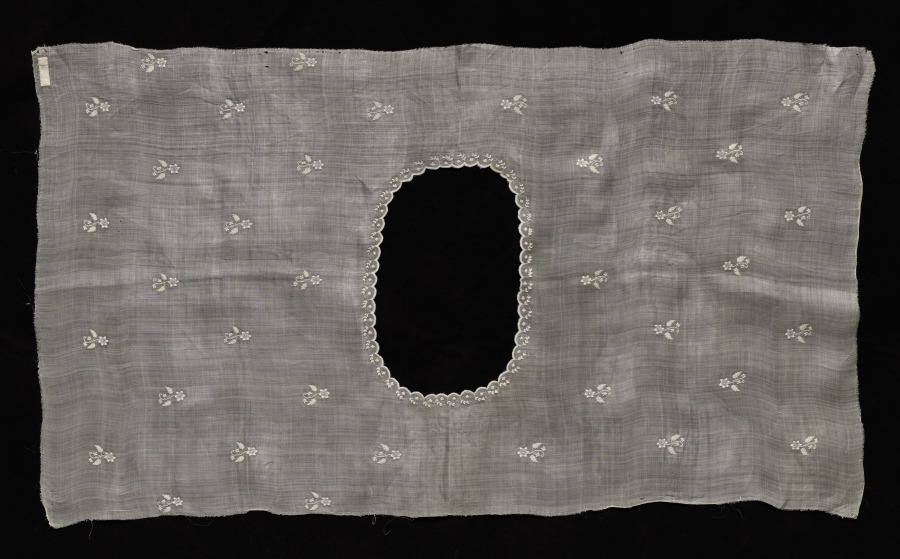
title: One of Four Blouse Pieces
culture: Philippines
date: 1800s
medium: Plain weave piña; white cotton embroidery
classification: Embroidery